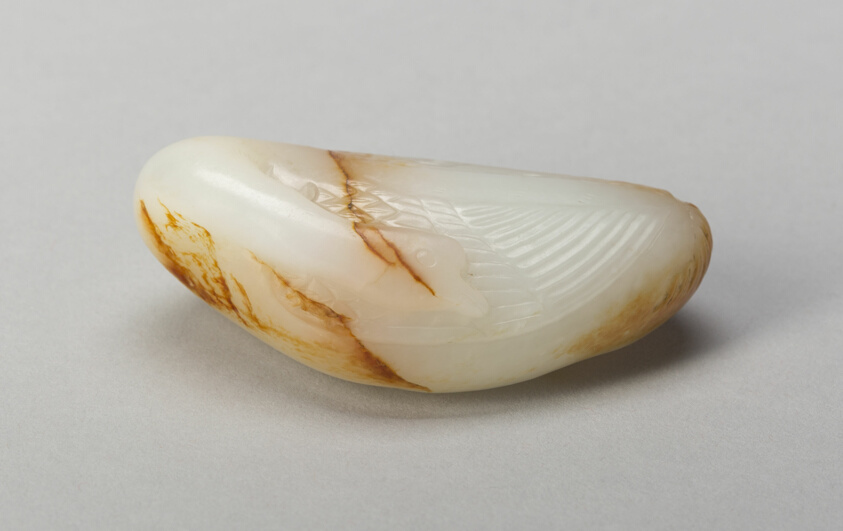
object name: Decorative Arts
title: Swan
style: Chinese (culture or style)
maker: China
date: late Ming (1368–1644) or early Qing dynasty (1644–1911), 17th century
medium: Jade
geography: China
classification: jade; asian art; decorative arts